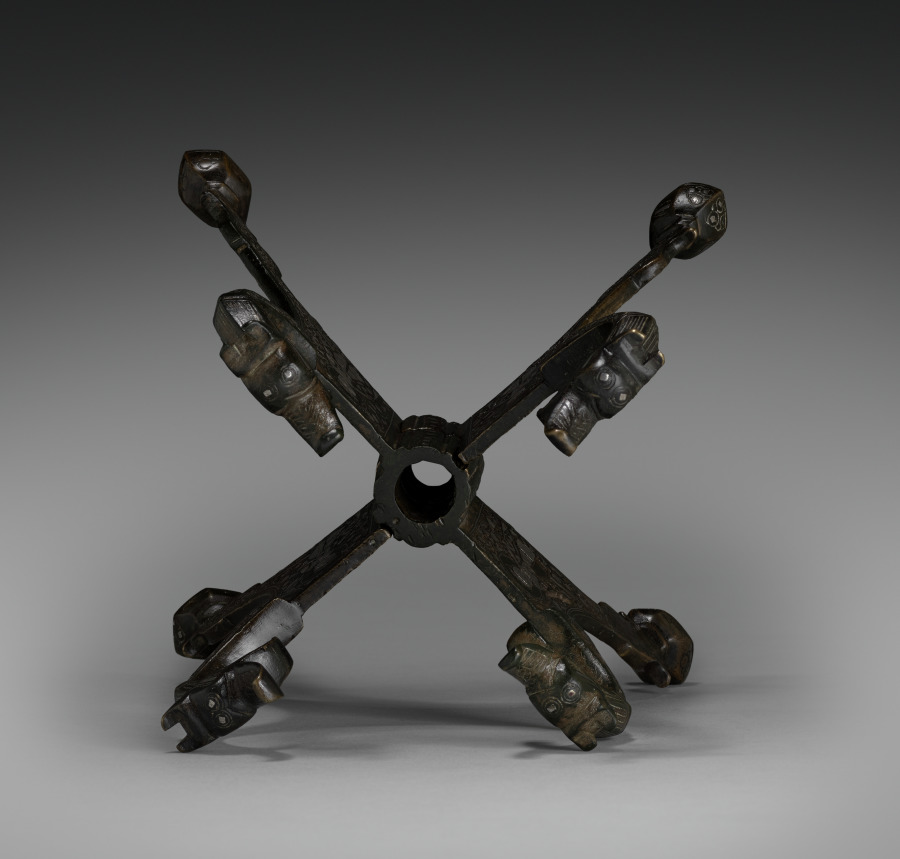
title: Dragon-headed Stand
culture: Northern Iraq or Syria, Zangid (1127–1251) or Ayyubid period (1171–1260)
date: 1200s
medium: cast brass inlaid with silver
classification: Metalwork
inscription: None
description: Themes of hunting and combat are evoked by this stand with gaping dragon heads and figures armed with swords and spears.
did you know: The four-legged stand has two interlocking parts.